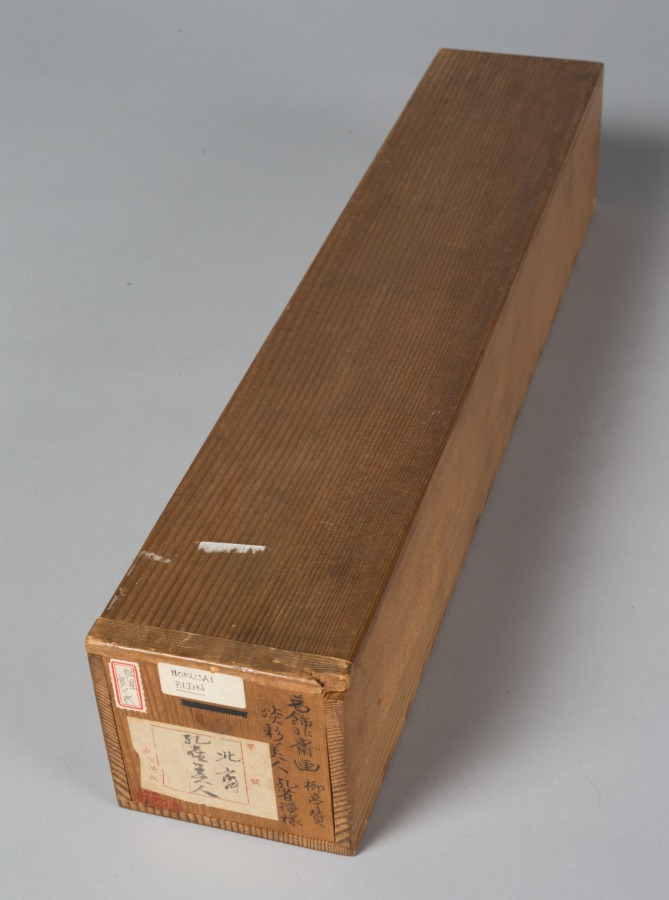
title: Beauty (Bijin)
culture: Japan, Edo period (1615–1868)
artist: Katsushika Hokusai (Japanese, 1760–1849)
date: c. 1775–1849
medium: hanging scroll; ink and color on paper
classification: Painting